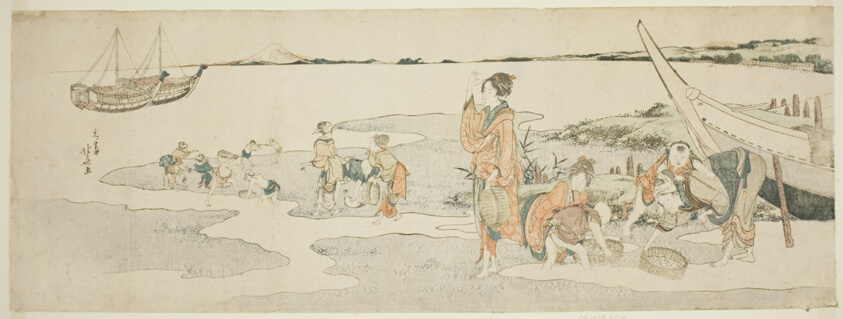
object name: Print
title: Shellfish gathering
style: Japanese (culture or style)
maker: Katsushika Hokusai 葛飾 北斎; Japanese, 1760-1849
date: c. 1800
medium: Color woodblock print; surimono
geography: Japan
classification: woodblock print; print; asian art